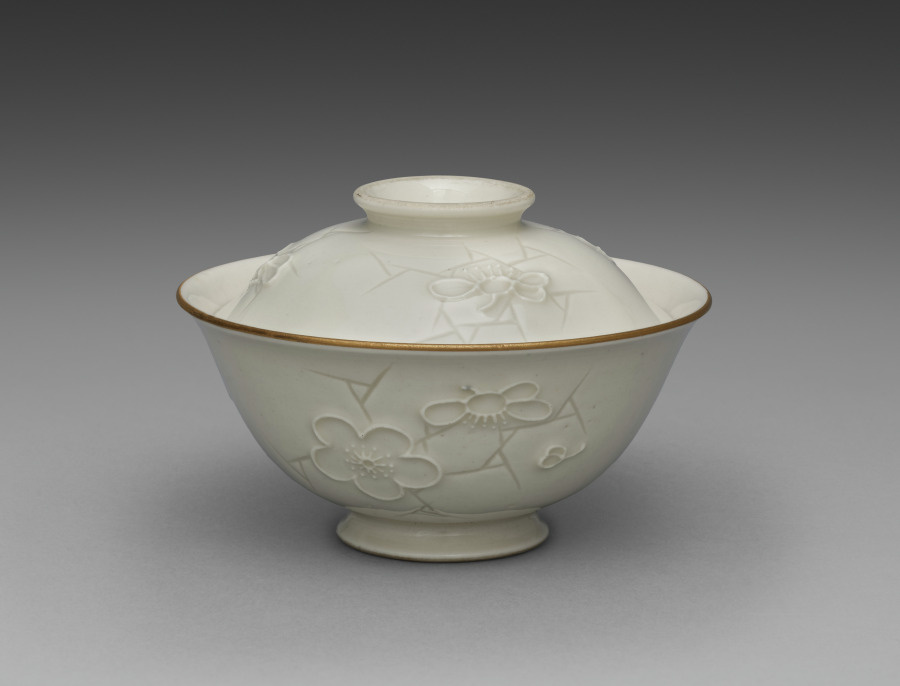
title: Covered Bowl from Dining Set with Plum Blossoms and Cracked-Ice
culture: Japan, Meiji period (1868–1912)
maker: Seifū Yohei II (Japanese, 1844–1878)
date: c. 1875–78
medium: Porcelain with molded designs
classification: Ceramic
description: Each item in this set has a delicate low-relief design of flowering plum branches over scattered, intersecting lines meant to resemble the cracked-ice surface of a frozen body of water and is signed on the base in gold pigment. While Yohei II produced many fine works in underglaze blue, like those produced by Kiyomizu Shichibei, he also made works in quite different styles later in his career, from the early 1870 s. In 1873, he was appointed purveyor to the Industrial Center of Kyoto Prefecture, a designation associated with Kyoto’s efforts to reach an international market through the port of Kobe; and from 1875 until his death, he was involved in national-level projects to present Japanese ceramics across the world. It was during this period that Yohei III was apprenticed to Yohei II, and it has been suggested that this set may in fact be an early example of Yohei III’s work, which he signed with his teacher’s name. Decorated with flowers resembling Japanese textile motifs, the set calls to mind the design of Yohei II’s pair of vases with plum blossoms in the Victoria and Albert Museum. Here, the elaborate trees created for a formal public exhibition setting have been translated into the approachable blossoms of the genteel domestic environment. While the designs are consistent across the pieces, each raised flower petal and pistil and each incised line in the ice was done by hand, so the cups, bowls, and dishes are similar yet unique. The bottoms of two boxes once identified the set’s owner, but the information has been deliberately obscured with black ink. However, inscriptions still visible appear to indicate two occasions, once at the end of July 1886 , and once again in June 1916 , when parts of the set were requested from Hokura in Niigata Prefecture. The location corresponds to a neighborhood in the present-day city of Jōetsu. The surname Tsuji 辻 also appears on a paper tag affixed to one of the box cloths. Future research may possibly reveal more about their provenance. A vase by Yohei III in a private collection combines the formal grandeur of the Yohei II vases in the Victoria and Albert Museum with the gentler design of this dining set, placing flowering plum trees against soft, scalloped-edge clouds resembling those in golden screens.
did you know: The dining wares have a creamy white coloration that the four boxes containing them identify as Korean in style.